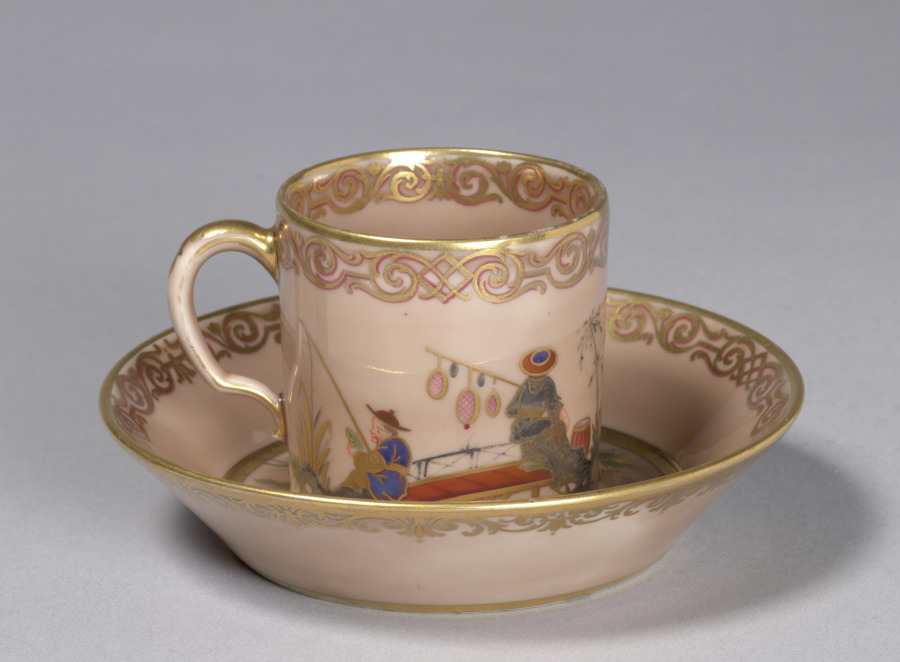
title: Cup and Saucer (Gobelet litron et soucoupe)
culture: France, Sèvres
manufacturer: Sèvres Porcelain Factory (French, est. 1756)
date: 1778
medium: hard-paste porcelain with overglaze enamel decoration and gilt and silver decoration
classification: Ceramic